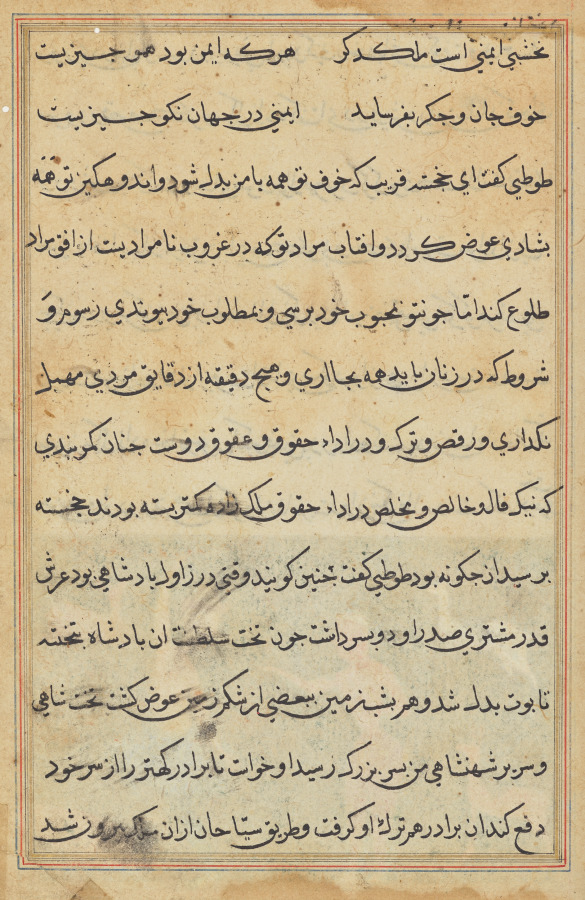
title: Page from Tales of a Parrot (Tuti-nama): text page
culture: Mughal India, court of Akbar (reigned 1556–1605)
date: c. 1560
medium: gum tempera, ink, and gold on paper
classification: Painting